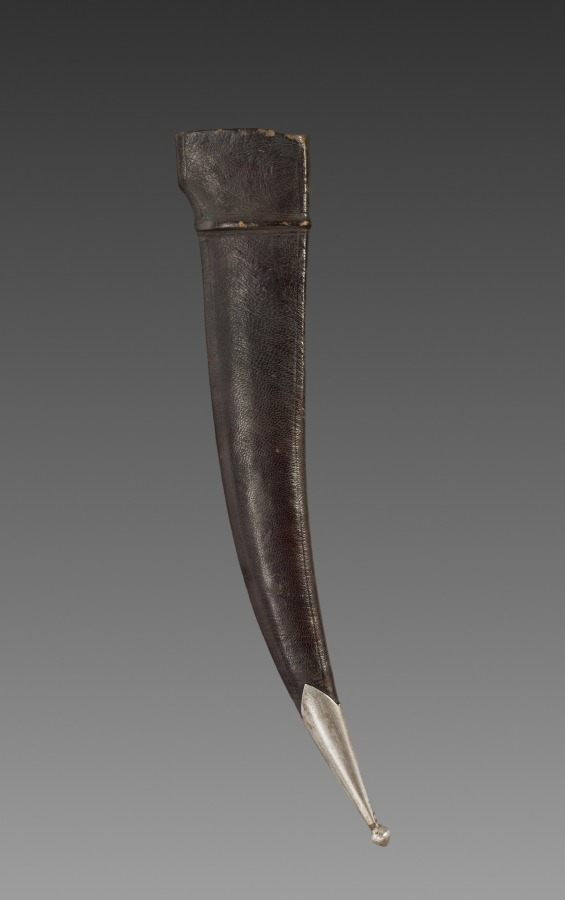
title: Scabbard for Dagger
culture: India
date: 1800s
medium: bronze and jade with leather and silver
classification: Arms and Armor